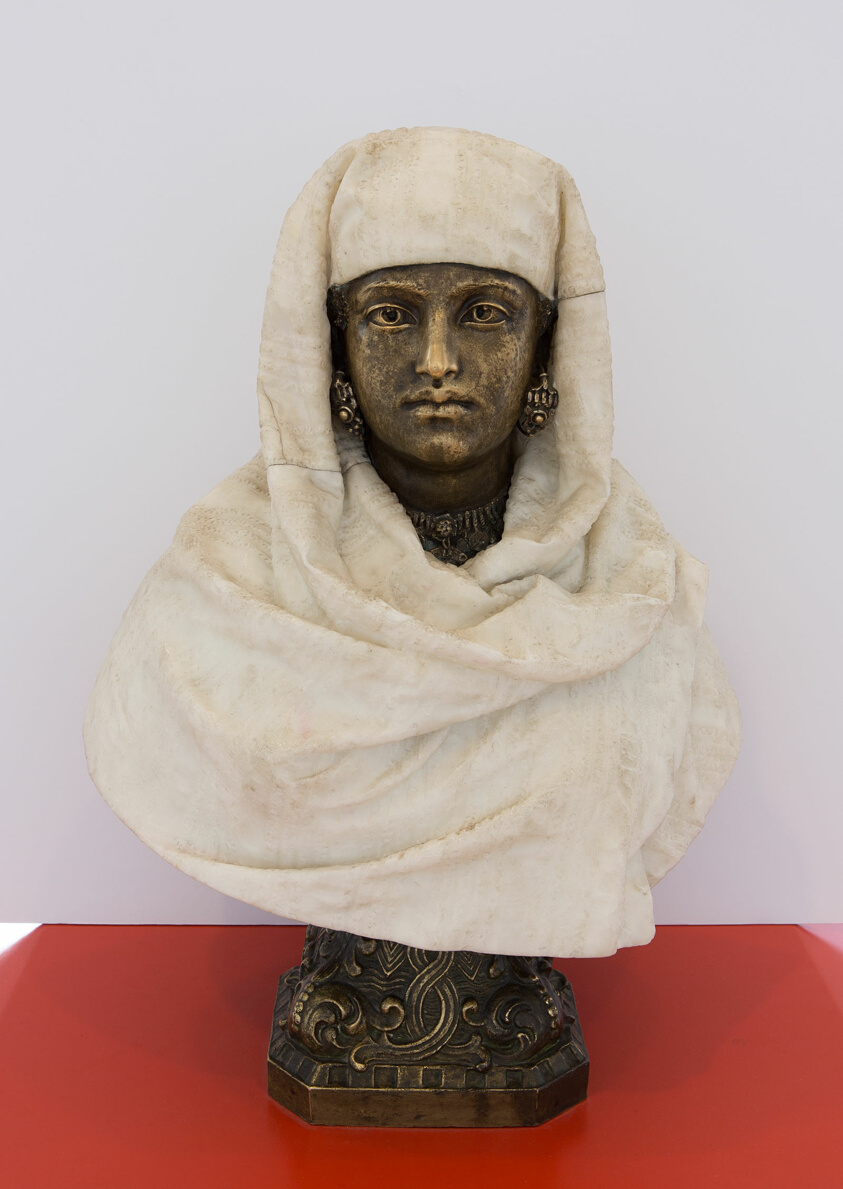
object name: Sculpture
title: Female Bust (possibly Aïda)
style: nineteenth century, 19th century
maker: Pietro Calvi (Italian, 1833–1884)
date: c. 1875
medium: Marble and bronze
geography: Italy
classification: bust/head; Italian; sculpture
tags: busts, woman, portraits: female subject, portraits, portrait, headdresses